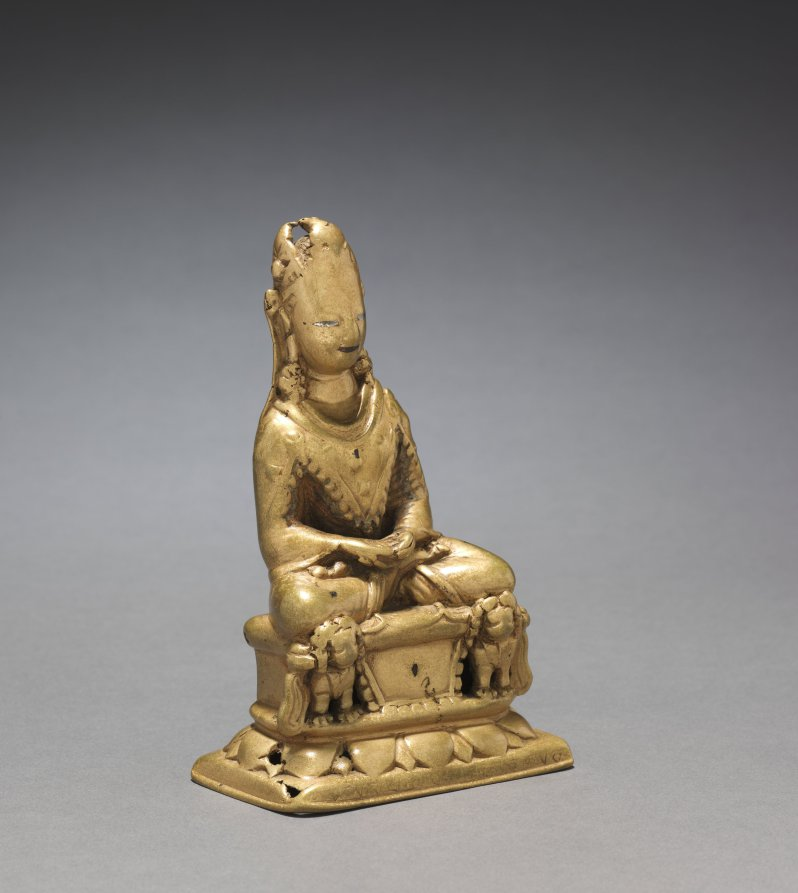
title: Crowned Buddha Seated on a Lion Throne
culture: India, Kashmir, 8th century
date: 700s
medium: brass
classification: Sculpture